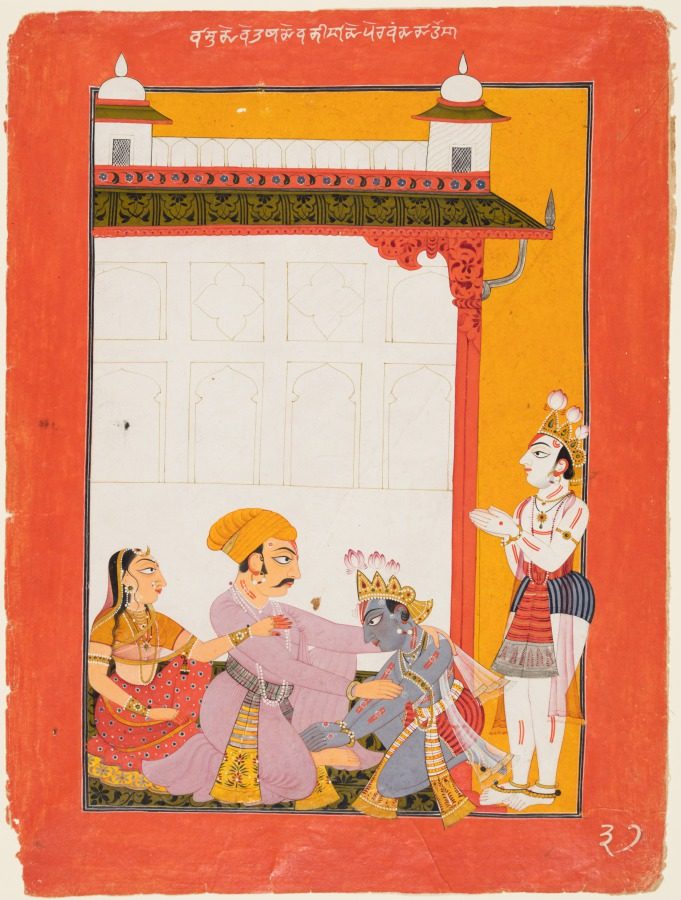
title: Krishna and Balarama touching the feet of Vasudeva and Devaki, from the “Vertical” Bhagavata Purana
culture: Northern India, Pahari kingdoms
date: c. 1700–1725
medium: Gum tempera, gold, and silver on paper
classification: Painting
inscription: vāsudeve tatha devakīyā de pera baṃdadā hoyā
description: This intensely emotional scene depicts the reunion of the blue-skinned god Krishna with his parents for the first time since the night of his birth. The stark white expanse of wall that fills most of the composition evokes the desolate years of separation during which time his parents were in prison. According to the story, Krishna and his half-brother, the white-skinned Balarama, have just slain a wicked king and freed his parents. Nevertheless, they all wear fine garments and ornaments. The artist elected to emphasize the appearance of good fortune over realism, signaling to the viewer that this is a happy reunion.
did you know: Krishna and Balarama wear a ring of bells on each foot.